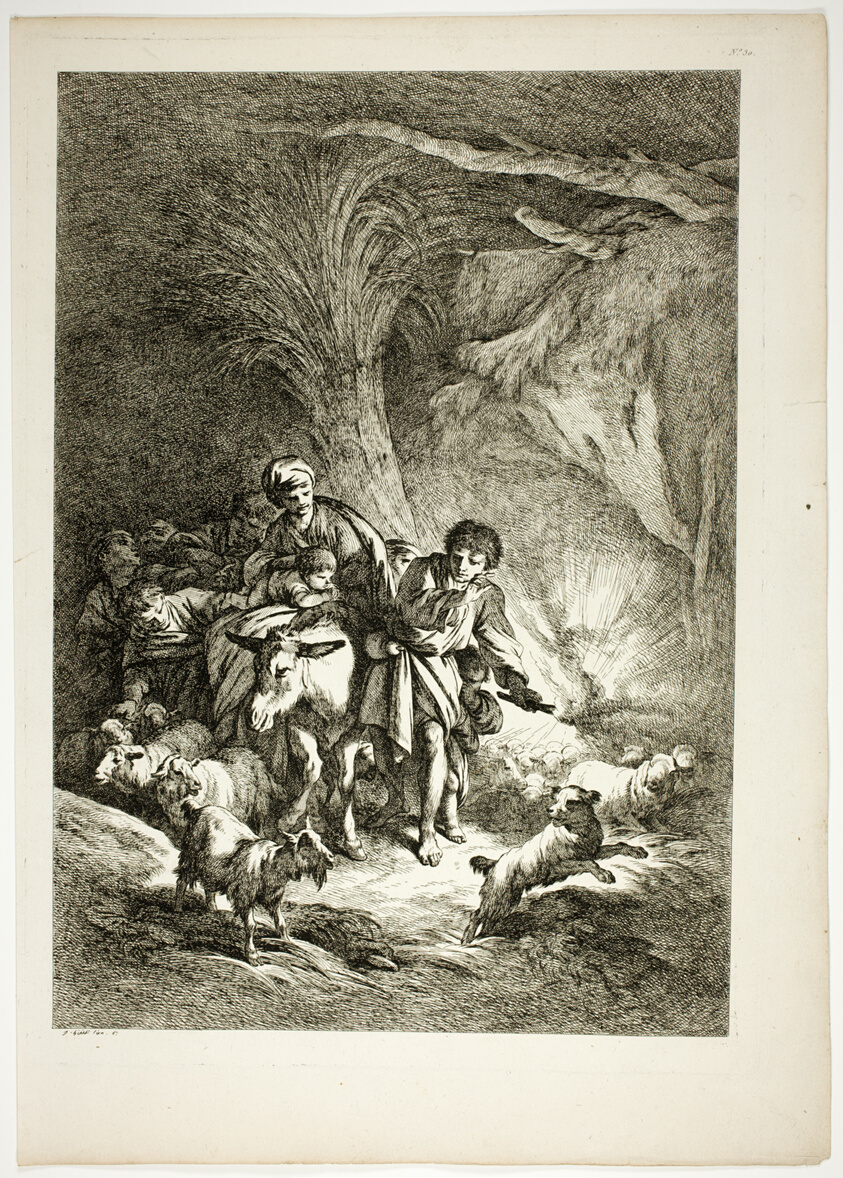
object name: Print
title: Plate 30 of 38 from Oeuvres de J. B. Huet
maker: Jean Baptiste Huet (French, 1745-1811)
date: 1796–99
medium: Etching on paper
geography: France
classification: etching; print; prints and drawing